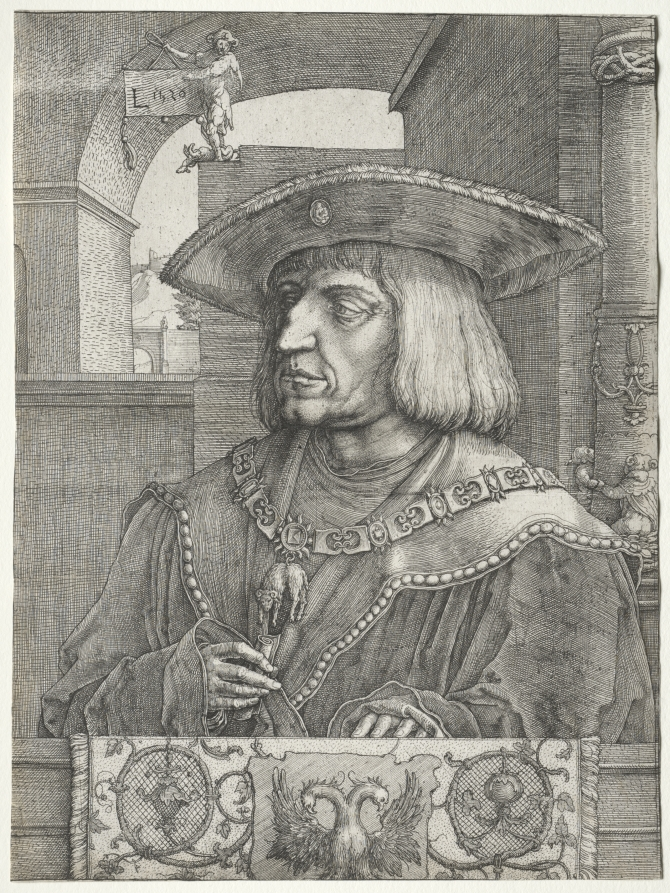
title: Emperor Maximilian I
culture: Netherlands, 16th century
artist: Lucas van Leyden (Netherlandish, 1494–about 1533)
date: 1520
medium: engraving and etching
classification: Print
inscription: uppper left, in plate: L 1520 ; VERSO, lower left, in graphite: 19909 MK